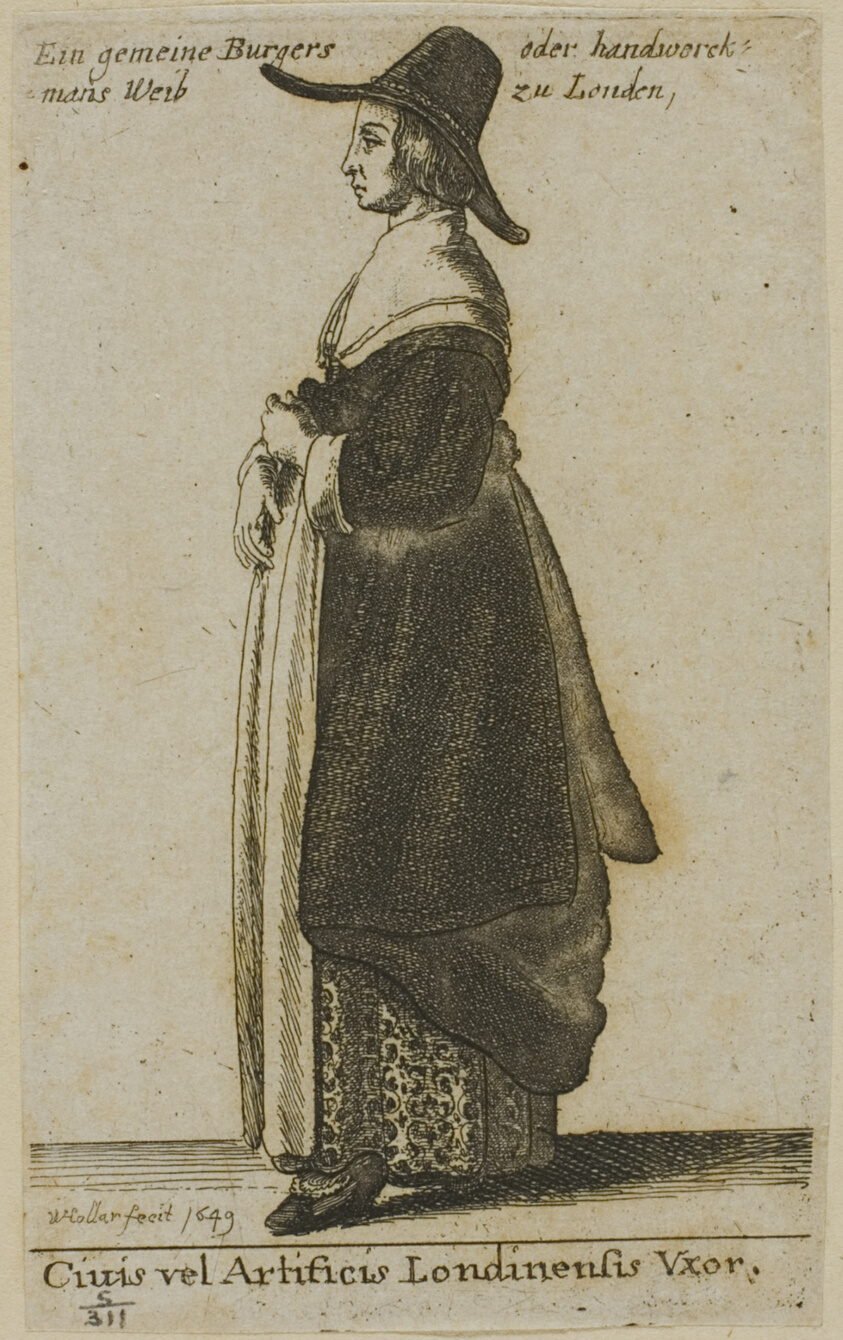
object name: Print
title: London Wife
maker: Wenceslaus Hollar (Bohemian, 1607-1677)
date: 1649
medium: Etching on gray Asian paper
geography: Bohemia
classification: etching; print; prints and drawing